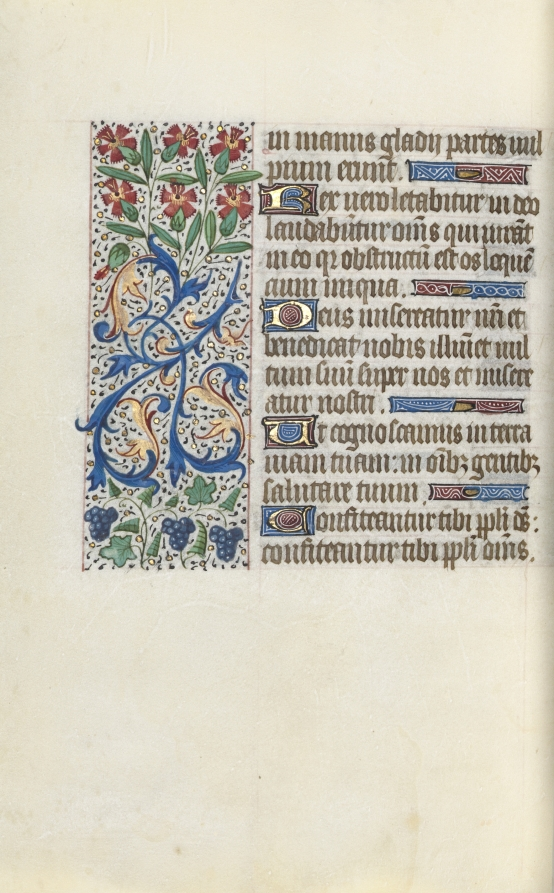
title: Book of Hours (Use of Rouen): fol. 138v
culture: France, Rouen, 15th century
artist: Master of the Geneva Latini (French, active Rouen, 1460–80)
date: c. 1470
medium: ink, tempera, and gold on vellum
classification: Bound Volume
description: In the late 1400s and early 1500s Rouen was an established and important center of book production. The city’s cathedral had a wealthy chapter that spent large sums of money to commission books and to maintain its extensive library. The stationers and booksellers would have likely been concentrated in or near the cathedral precinct. This artist, named after a manuscript now in Geneva, was Rouen’s principal illuminator during the second half of the 1400s.